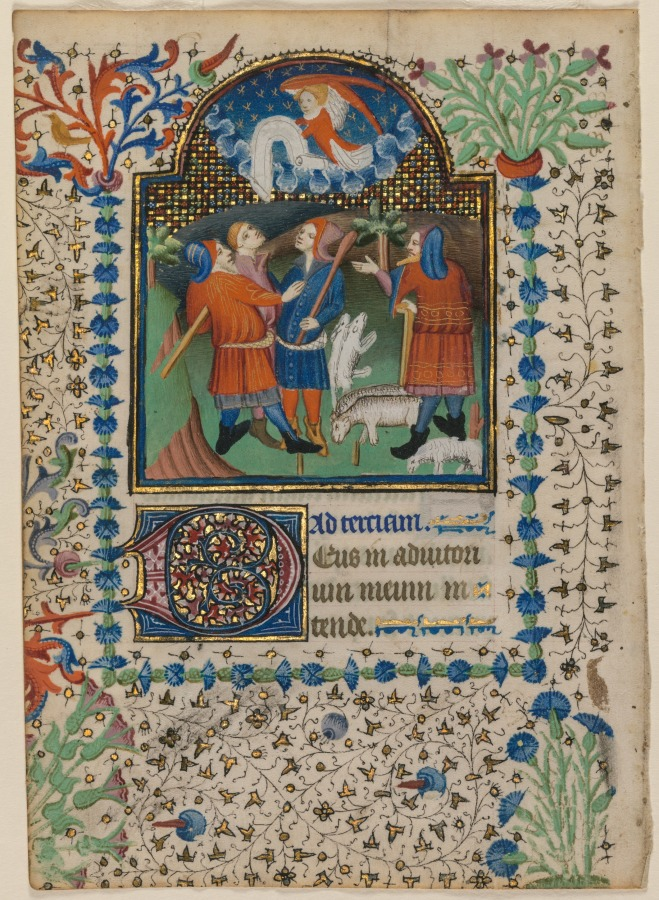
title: Leaf from a Book of Hours: Annunciation to the Shepherds (recto)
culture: France, Paris (?), 15th century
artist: Boethius Illuminator (Flemish, active c. 1414–20)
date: c. 1410–20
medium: ink, tempera and gold on vellum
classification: Manuscript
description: This finely preserved leaf with its large miniature is stylistically consistent with the work of the Boethius Illuminator. An unusual and very original painter, he was named after a manuscript copy of the works of the Roman philosopher Boethius (AD 480-524), which he illuminated in 1414. The artist favored bright, sweeping colors and expressionistic compositions. He used tessellated (mosaic-patterned) grounds in his miniatures, as is the case here. The Boethius Illuminator and his assistants participated in the illustration of over a dozen manuscripts between 1414 and 1418/20. It was not unusual for artists working in different styles to collaborate on a single book of hours during the 1400s and 1500s.